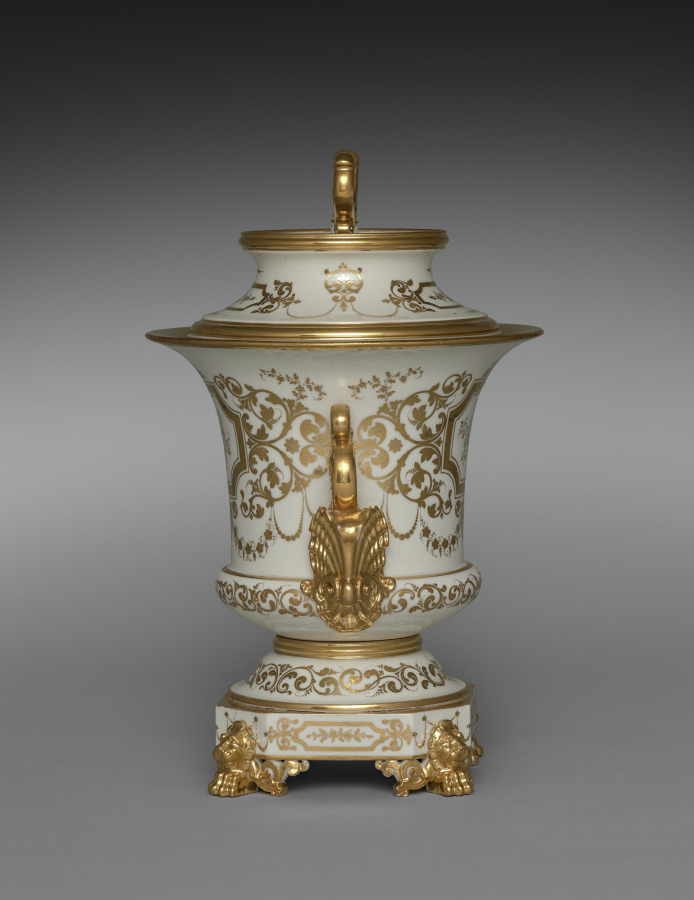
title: Covered Ice Cream Pail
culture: France, Paris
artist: Factory of Jacob-Petit (French, 1830–1865)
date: c. 1840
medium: gilt porcelain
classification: Ceramic